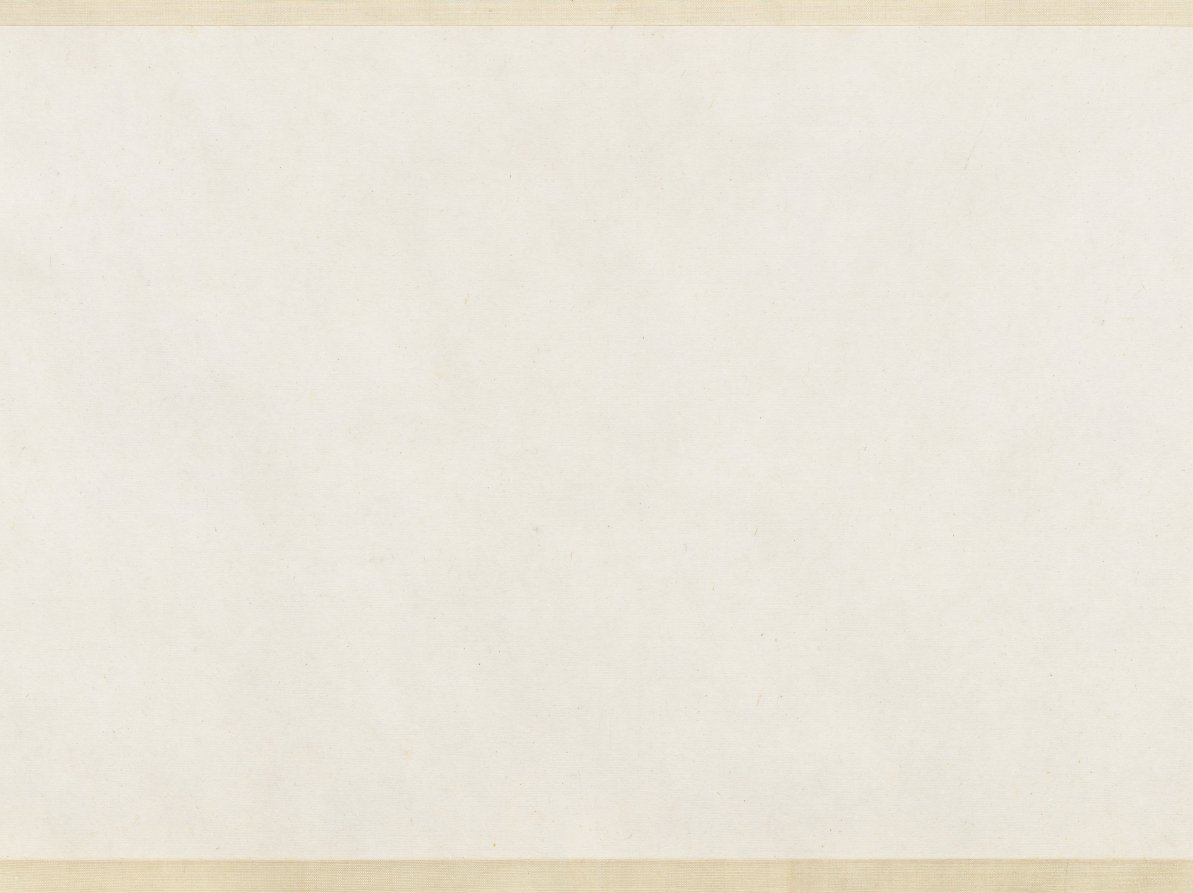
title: Sericulture (The Process of Making Silk)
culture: China, Southern Song dynasty (1127-1279)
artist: attributed to Liang Kai (Chinese, mid-1100s–early 1200s)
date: early 1200s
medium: Handscroll; ink and color on silk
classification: Painting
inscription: 3 colophons and 7 seals of Ch'eng Ch'i (20th c.).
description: By the Southern Song period, the economic center of the silk industry had shifted to the lower Yangzi delta, while the north continued to be troubled by wars. Divided into three sections, the handscroll illustrates 14 steps in the process of making silk, from the raising of silkworms to the weaving of silk cloth. The scroll’s scenes follow the illustrations of Lou Shou’s (1090–1162) Pictures of Tilling and Weaving (gengzhi tu), the first recorded painting of this genre, which was conceived in Hangzhou around 1145. However, in the Cleveland painting the artist groups several scenes of sericulture together under the roof of an open structure.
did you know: The painting is attributed to Liang Kai, a court artist active from about 1201 to 1204 at the Imperial Painting Academy in the city of Hangzhou, a major silk weaving center from that time to the present day.